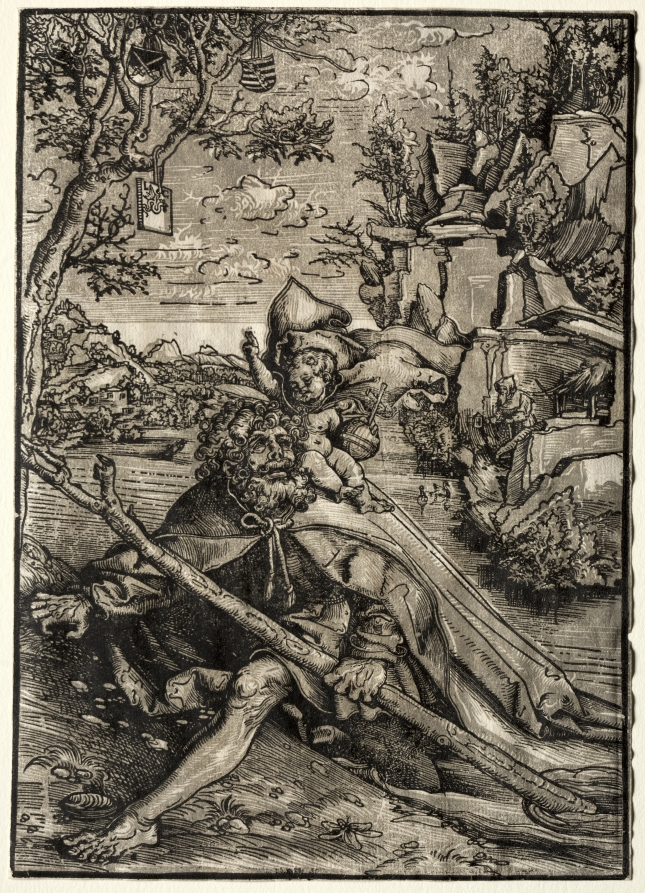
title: St. Christopher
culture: Germany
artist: Lucas Cranach (German, 1472–1553)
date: c. 1509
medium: chiaroscuro woodcut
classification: Print